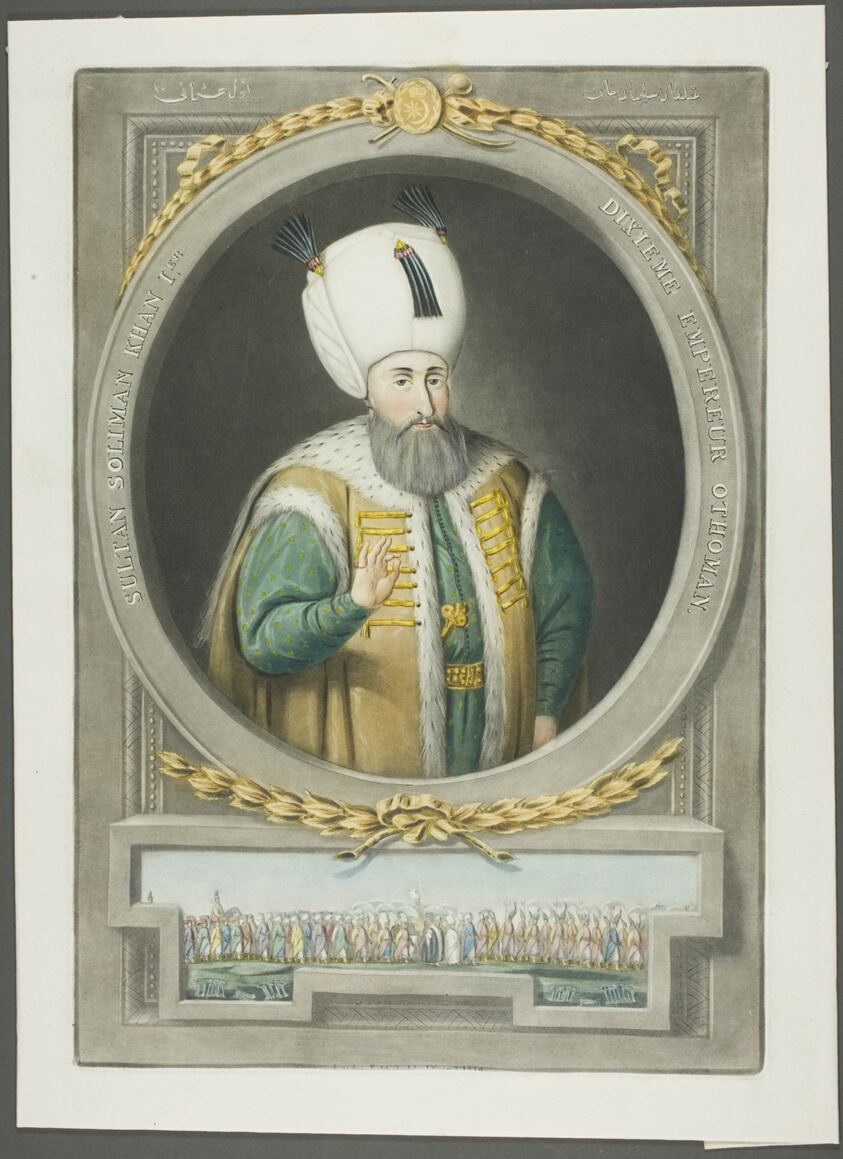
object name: Print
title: Soliman Kahn I, from Portraits of the Emperors of Turkey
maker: John Young (English, 1755-1825)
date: 1815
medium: Mezzotint, hand-colored with brush and watercolor, on ivory wove paper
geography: England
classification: mezzotint; print; prints and drawing